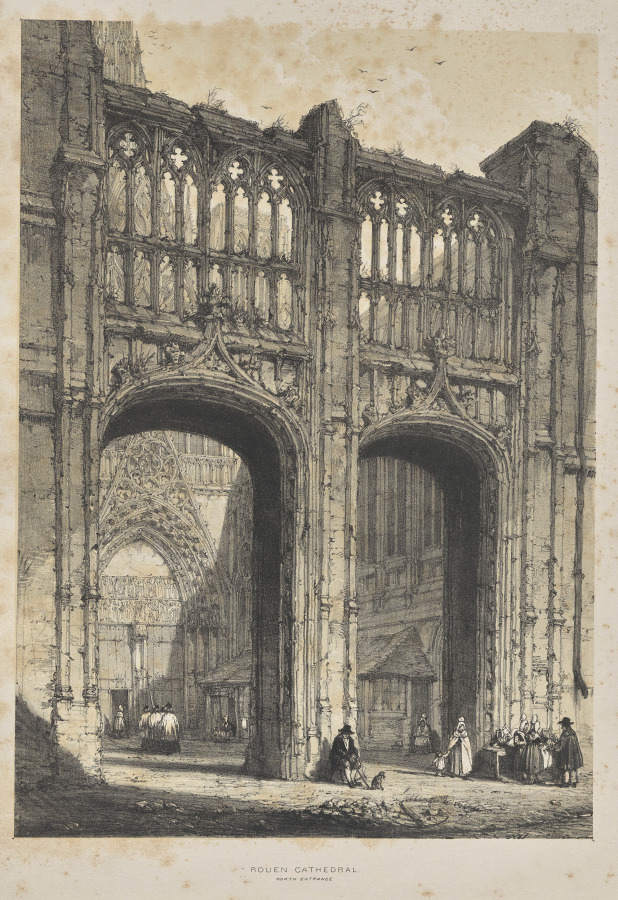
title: Architecture of the Middle Ages: Rouen Cathedral, North Entrance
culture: England, 19th century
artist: Joseph Nash (British, 1808–1878)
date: 1838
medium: lithograph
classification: Print